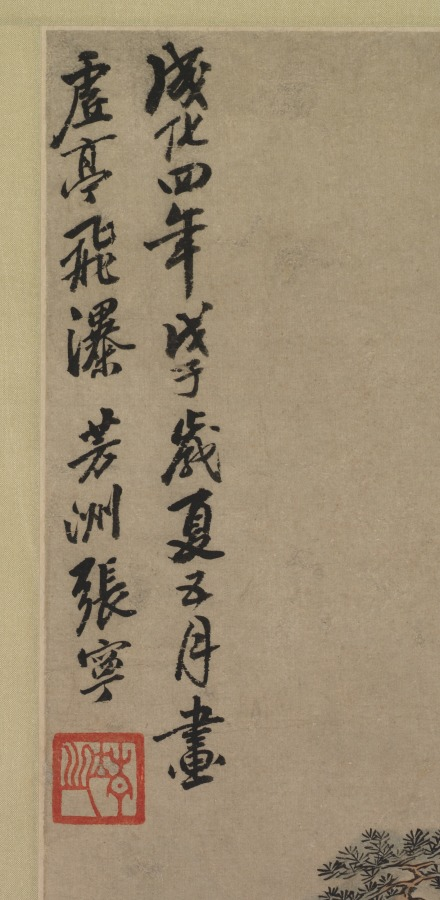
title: Empty Arbor and Rapid Waterfall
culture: China, Ming dynasty (1368–1644)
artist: Zhang Ning (Chinese, 1426-c. 1495)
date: 1468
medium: hanging scroll, ink and color on paper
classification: Painting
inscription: Artist's inscription, signature, and 2 seals: Painted in the summer, the fifth month of the wu-tzu year, the fourth year of the Ch'eng-hua era [1468]. Empty Arbor and Rapid Waterfall. Fang-chou, Chang Ning [seals] Ching-chih; Fang-chou ts'ao-t'ang. 2 additional seals: 1 of Ch'eng Ch'i; 1 unidentified.